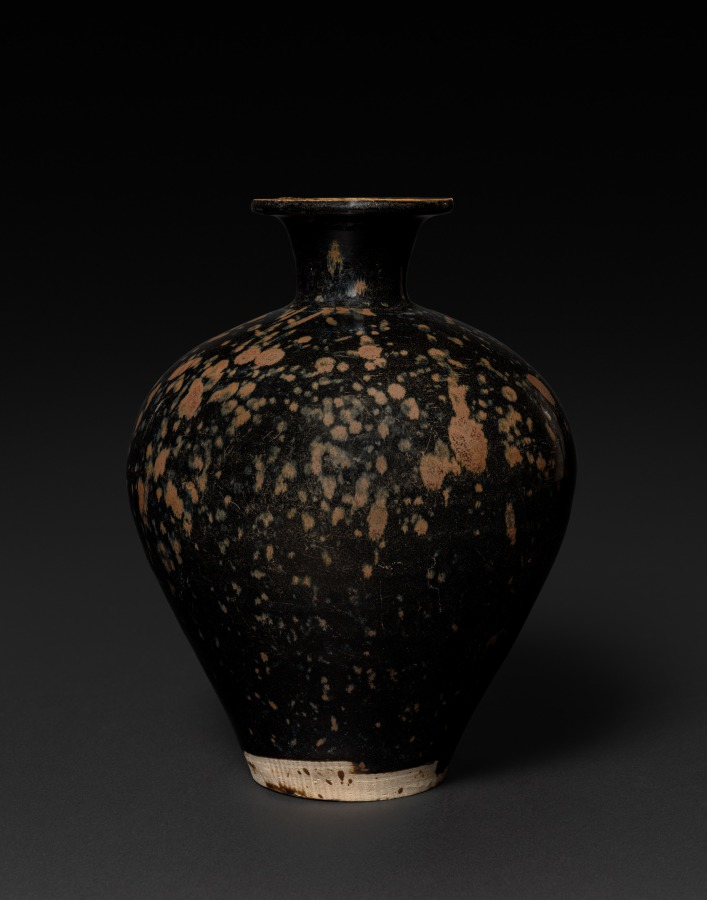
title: Vase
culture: China, Northern Song dynasty (960-1127)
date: 1000s–1100s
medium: glazed stoneware with underglaze iron decoration, Northern Black ware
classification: Ceramic